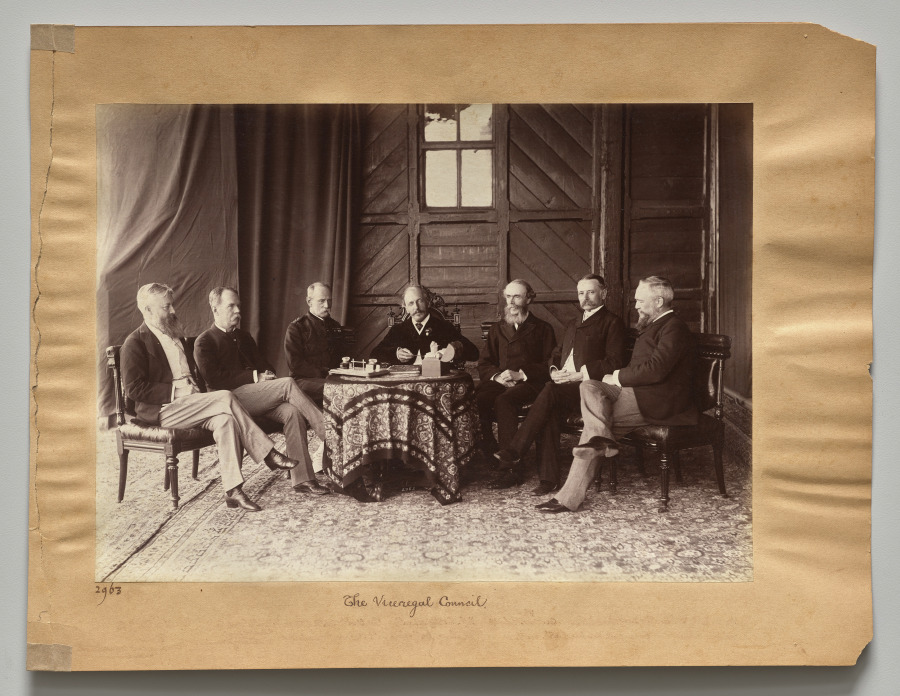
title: The Viceregal Council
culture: India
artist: Raja Deen Dayal (Indian, 1844–1905)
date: c. 1882–87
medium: albumen print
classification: Photograph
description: These photographs are part of an album, now disassembled, of around 105 photographs taken in India between 1885 and summer 1887 that provide glimpses into the lives of the British colonial elite and royal and upper-class Indians. The museum holds another group of 37 pictures from this album (2016.266), which was probably commissioned by a British civil servant visiting or working in India around 1888 as a personal souvenir of his experiences there.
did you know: Raja Deen Dayal is regarded now, and was considered during his lifetime, to be India’s most important 19th-century photographer.